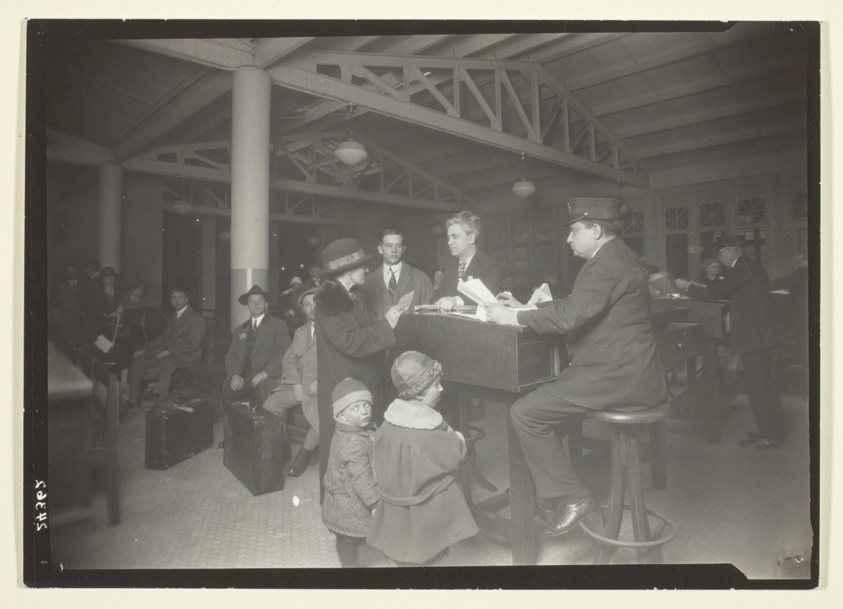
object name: Photograph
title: German Family, Interpreter and Recorder at Ellis Island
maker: Lewis Wickes Hine (American, 1874–1940)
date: 1926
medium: Gelatin silver print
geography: United States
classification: gelatin silver (developing-out-paper) pr; photographic process; photography; photograph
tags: Collected by Hugh Edwards, documentary